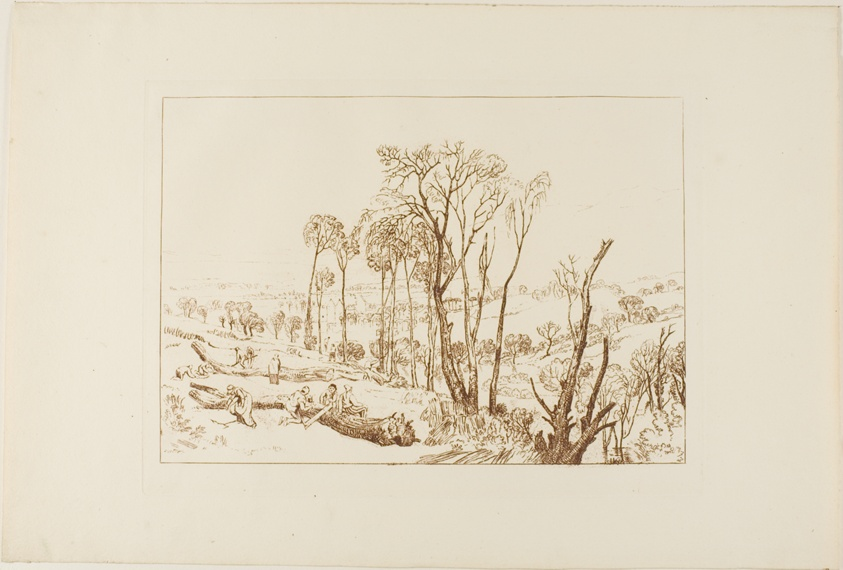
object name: Print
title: Crowhurst, plate 76 from Liber Studiorum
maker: Joseph Mallord William Turner (English, 1775-1851); Engraved by H. Dawe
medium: Etching on ivory wove paper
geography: England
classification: etching; print; prints and drawing